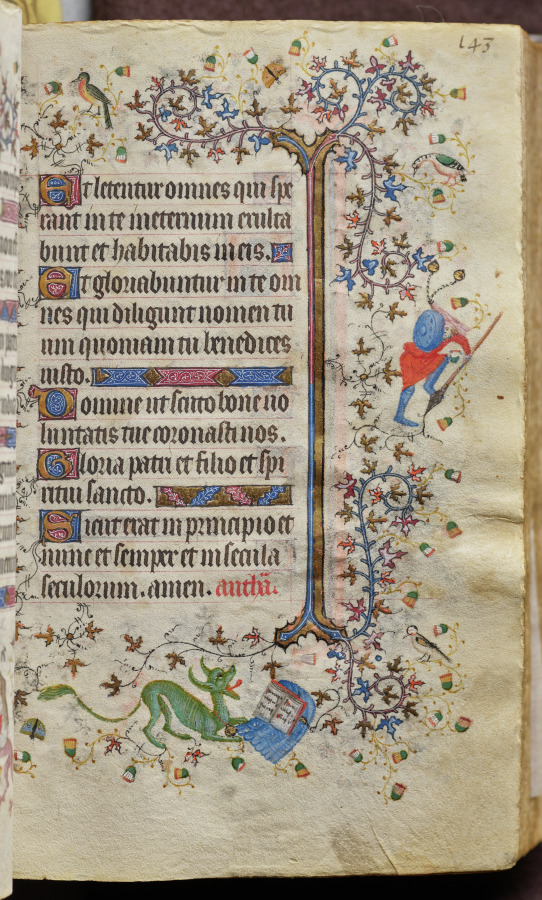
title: Hours of Charles the Noble, King of Navarre (1361-1425): fol. 72r, Text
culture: France, Paris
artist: Master of the Brussels Initials and Associates (French)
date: c. 1405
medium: ink, tempera, and gold on vellum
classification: Bound Volume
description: This precious volume was obviously highly prized by its owner, the French-born King of Navarre, who had his coat of arms painted on no less than twenty folios. Rather than directly commissioning this manuscript from a specific workshop, it seems that Charles the Noble acquired his book of hours -- perhaps ready-made for the luxury market -- while on a trip to Paris in 1404-05. A collaborative effort, six painting styles are evidenced within the pages of this codex, those of two Italians, two Frenchmen, and two Netherlanders. The painter who was responsible for the planning and decoration of the book, and who produced seventeen of the large miniatures, was a Bolognese artist known as the Master of the Brussels Initials. His principal assistant, responsible for most of the borders, was a Florentine who signed his name "Zecho" da Firenze on folio 208 verso.